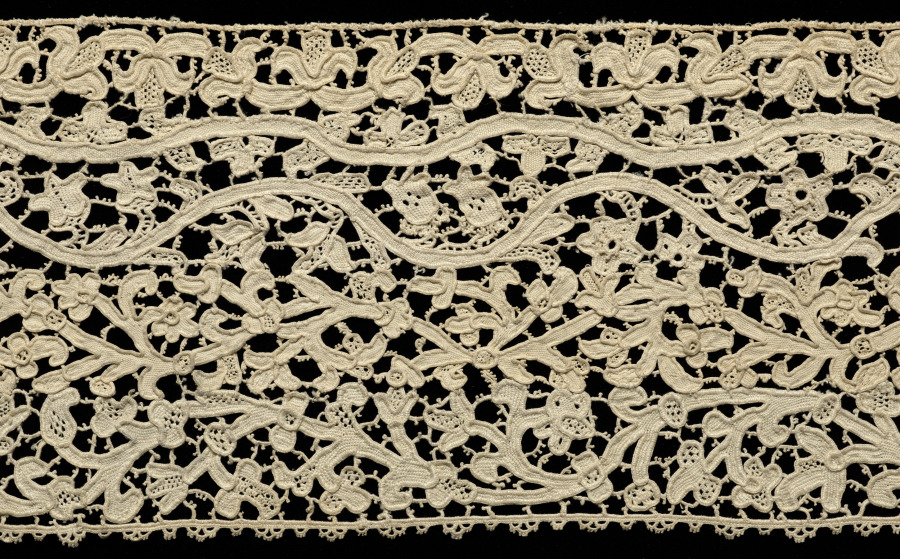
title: Lace Flounce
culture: Italy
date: 1600s–1700s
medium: Linen: needle lace and bobbin lace (Mezzo Punto)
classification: Lace